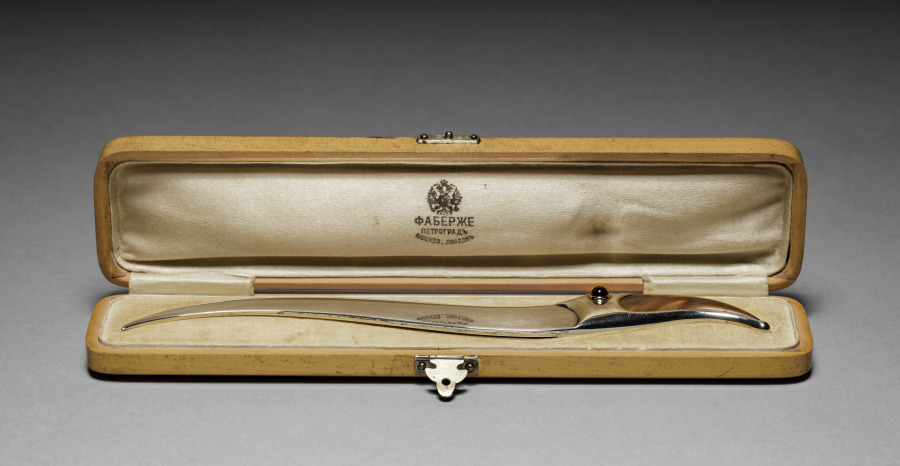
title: Letter Opener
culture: Russian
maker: House of Fabergé (Russian, 1842–1918)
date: c. 1899–1908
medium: Silver, bear claw, garnet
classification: Silver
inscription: “K. Fabergé” in Cyrillic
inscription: Cyrillic initials “AR”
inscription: kokoshnik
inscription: “88” silver standard